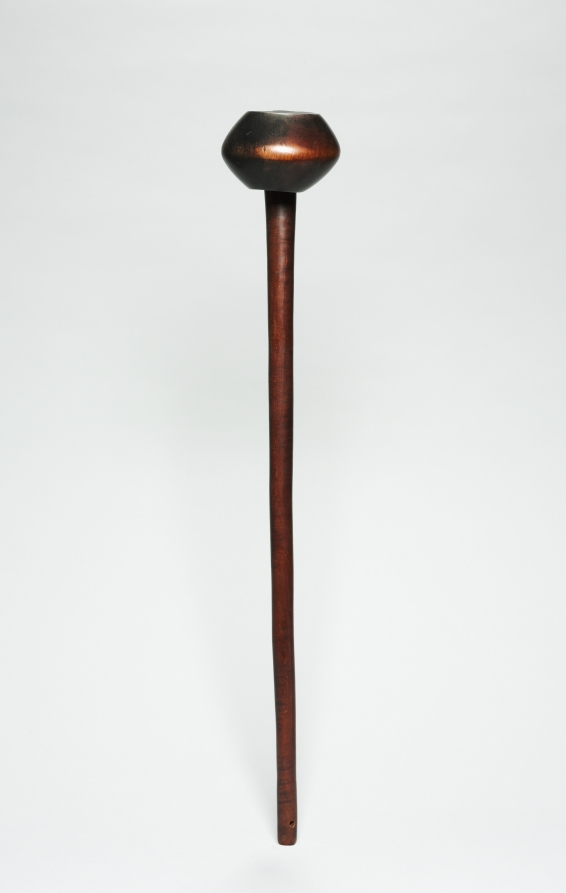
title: Club (Knobkerrie)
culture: Southern Africa, South Africa, Northern Ngun-style or Zulu-style maker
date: late 1800s or early 1900s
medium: Wood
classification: Arms and Armor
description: Relatively short sticks historically used for hunting and fighting are customarily called knobkerries. A combination of Afrikaans and Shona words, the name refers to the characteristic spherical knob of wood (knop) or head atop a cylindrical shaft (kirri). The knobs on these were carved into a tight whorl and a compressed sphere with a central rib. Even though their basic shapes were derived from real weapons, many of these precious objects were rarely if ever used as such. Highly personal, they instead functioned as ceremonial display items or regalia, symbolizing the masculinity and prowess of their owner.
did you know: The term knobkerrie refers to a characteristic spherical knob of wood or head atop a cylindrical shaft.